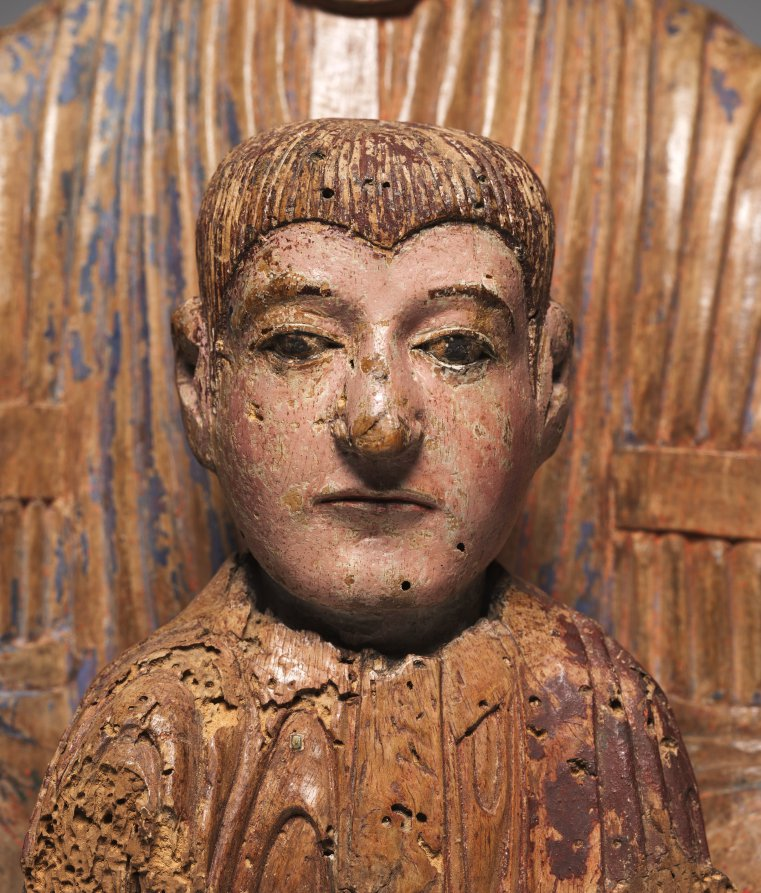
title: Virgin and Child in Majesty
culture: France, Auvergne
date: c. 1150–1200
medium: polychrome wood (walnut)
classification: Sculpture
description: This sculpture belongs to a group of early representations of the Virgin and Child known as the Sedes Sapientiae (the Throne of Wisdom). The subject embodies a complex and core Christian doctrine of the Virgin’s role in the Incarnation (the moment in which Christ became flesh) and ultimately in the redemption of humankind. Mary faces forward, her gaze toward the beholder. As she is seated on a throne, she in turn becomes the throne to the Christ child, thus symbolizing her role in giving birth not only to the human Jesus, but also to the divine Christ. The Incarnation gave Mary a unique role as principal mediator between heaven and earth, and between God and humankind. As a result, her image proliferated in art, especially after the 12th century, a period in which there was surging interest in Mary’s life and increasing devotion to her person and images. The sculpture belongs to a rare group of surviving figures produced in the Auvergne region of central France during the second half of the 12th century. These "Auvergne" Virgins are estimated to number only about 25 or 30 and are characterized by their linear, calligraphic draperies, which form beautiful swirls and contours. All such sculptures are smaller than life-size and made of wood in order to make them mobile. Evidence suggests that they were moved from altar to altar or church to church, and were frequently carried in procession within churches and town streets on Marian feast days. The heads were intentionally removable in order to "dress" them in costumes for such processions.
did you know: In this sculpture of Mary and Jesus, their heads are detachable.